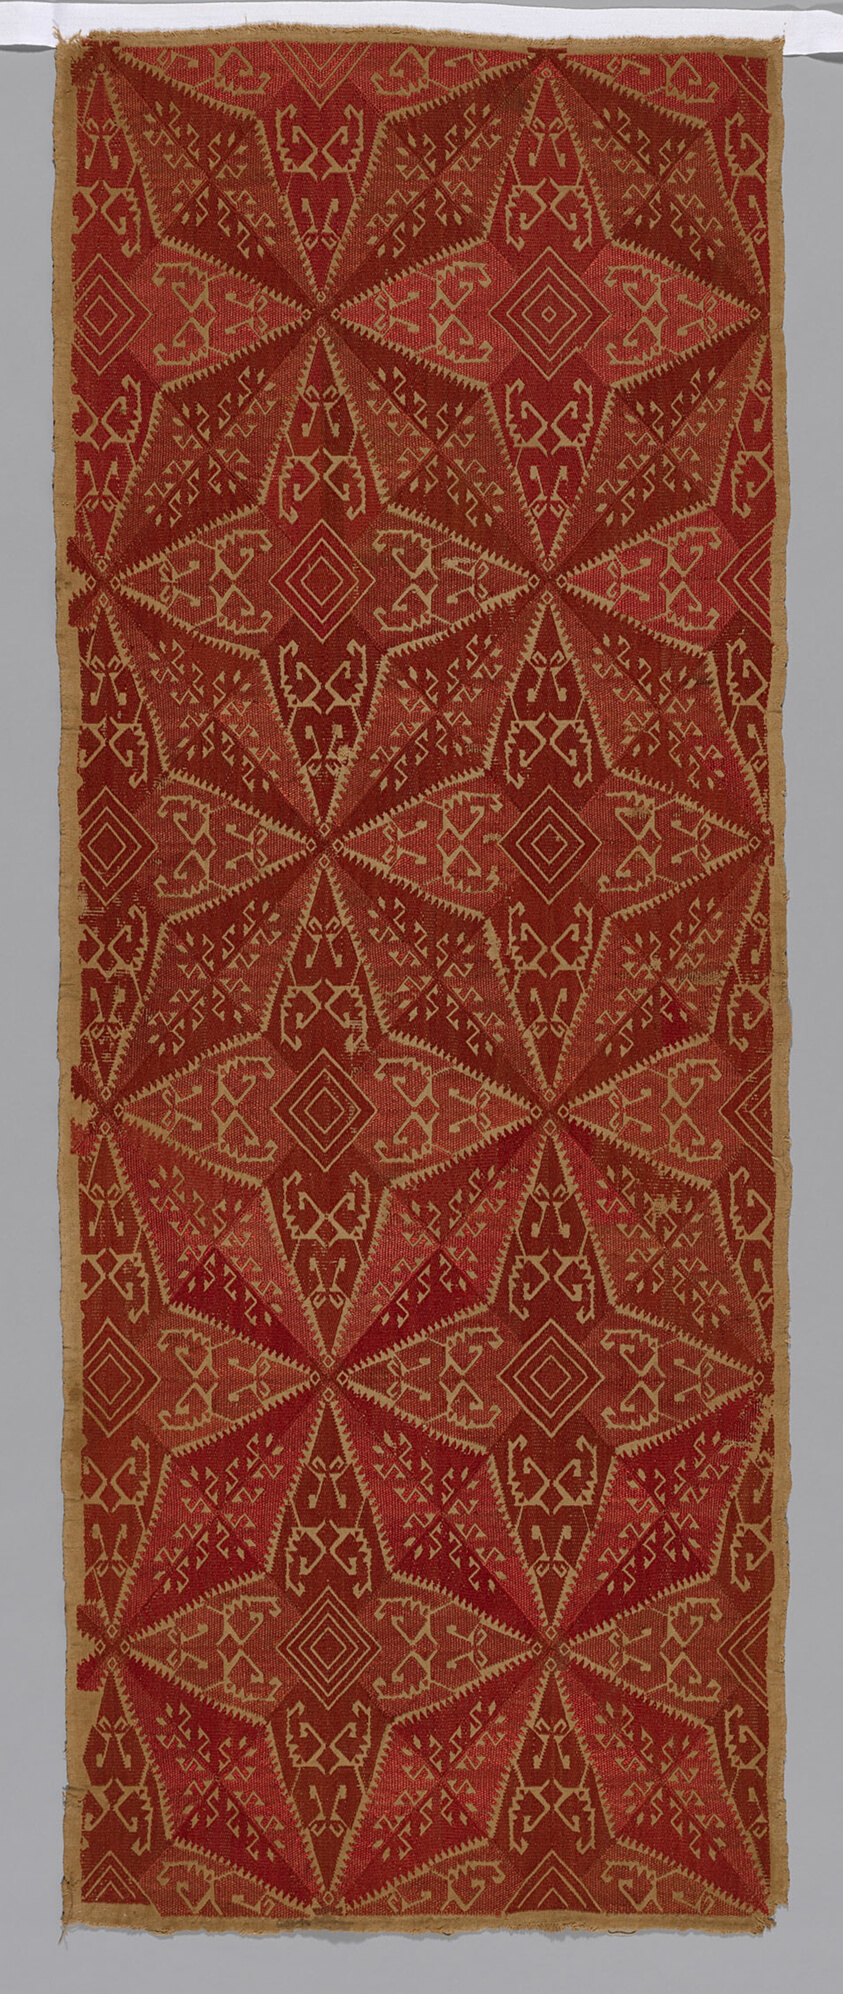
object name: Textile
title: Pillow Cover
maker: Greece, possibly Crete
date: 17th century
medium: Cotton, plain weave; embroidered with silk in running stitches (pattern darning)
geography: Greece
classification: textile; needlework (visual works)